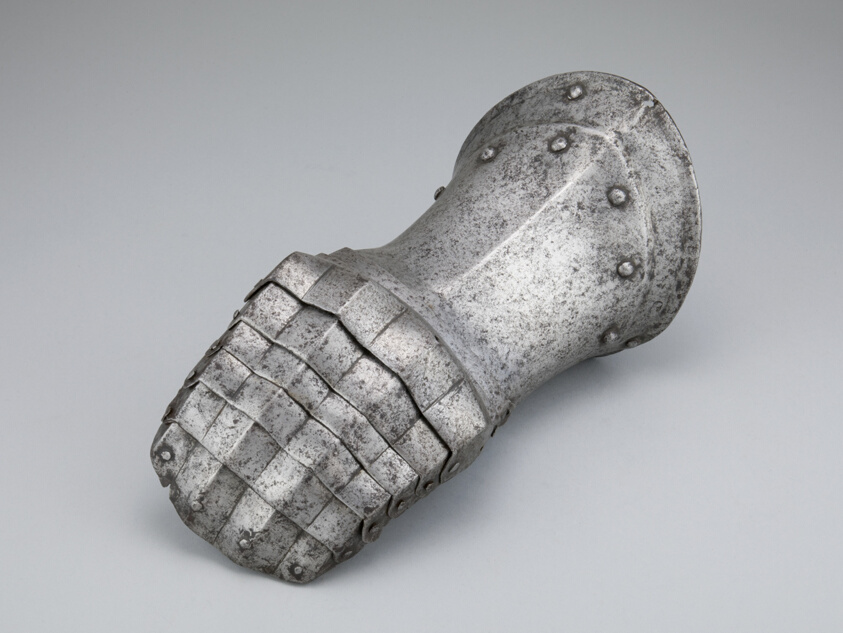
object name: Armor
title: Mitten Gauntlet for the Left Hand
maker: Italian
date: c. 1510/20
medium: Steel and textile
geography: Italy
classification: suit-gauntlet; armor; arms and armor